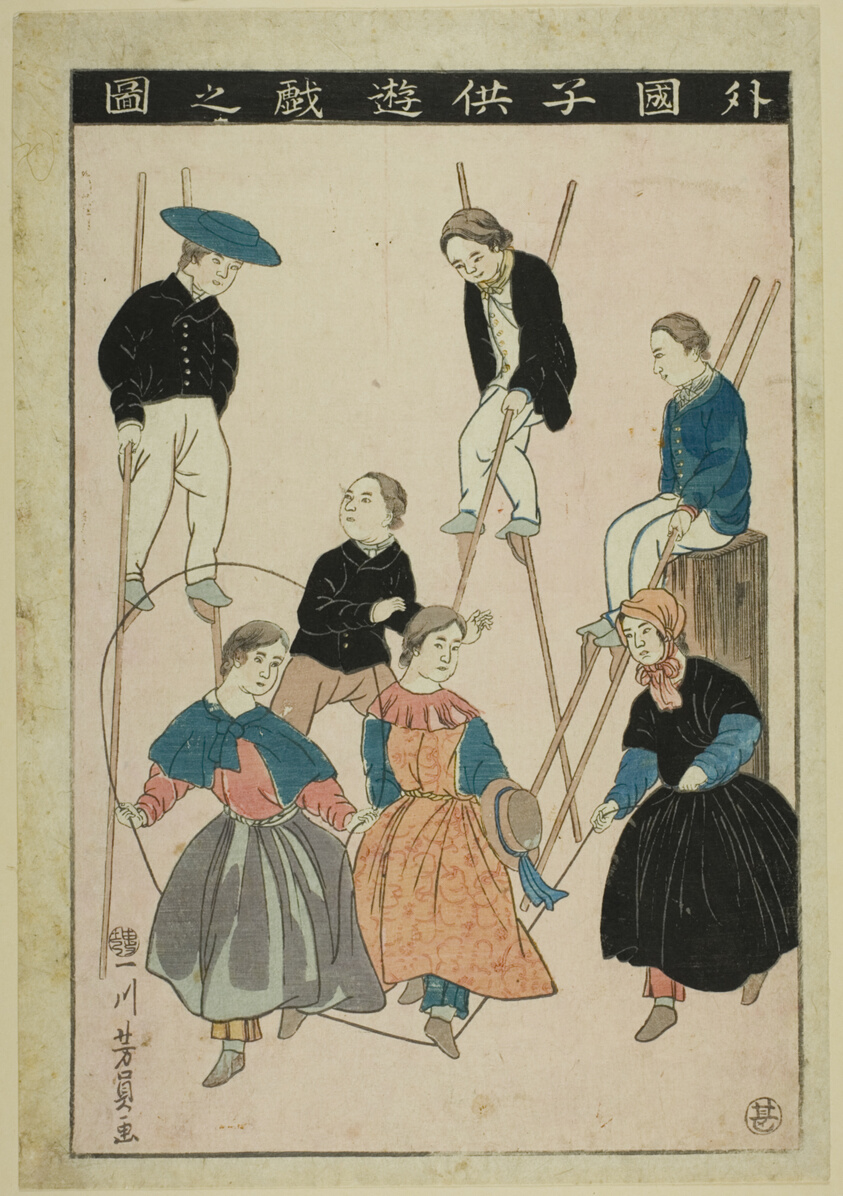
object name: Print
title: Foreign Children at Play (Gaikoku kodomo yugi no zu)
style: Japanese (culture or style)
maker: Utagawa Yoshikazu (Japanese, active c. 1850-70)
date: 1860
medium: Color woodblock print; oban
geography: Japan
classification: woodblock print; print; asian art